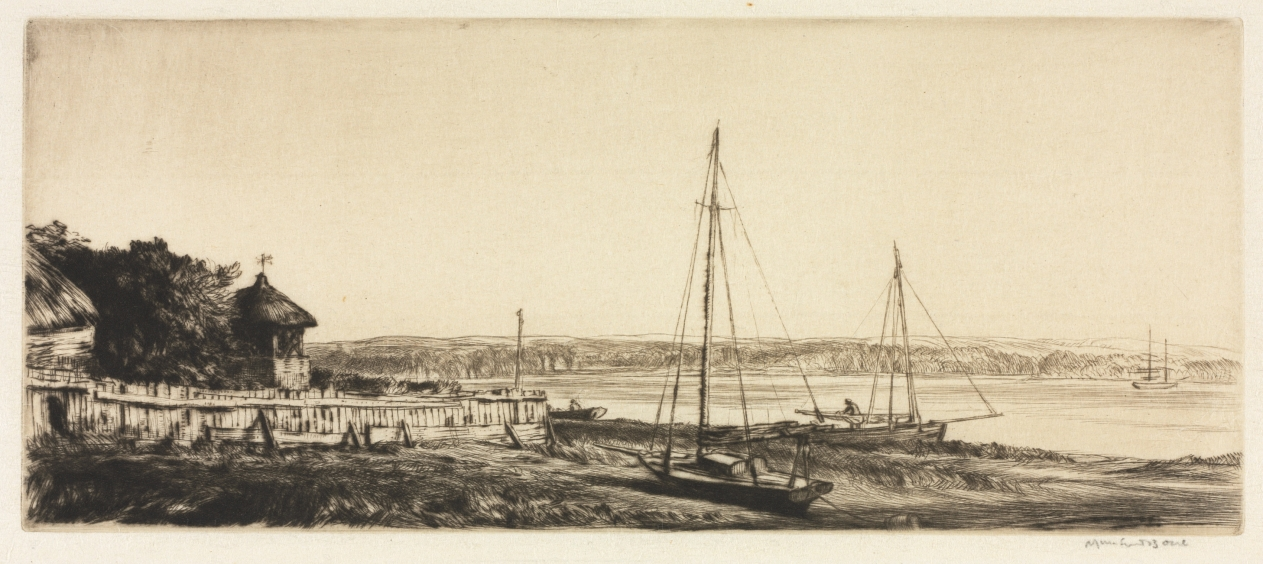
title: Near Chichester, Sussex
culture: England, 20th century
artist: Muirhead Bone (British, 1876–1953)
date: 1909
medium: drypoint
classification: Print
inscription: bottom right margin, in pencil: "Near Chichester"